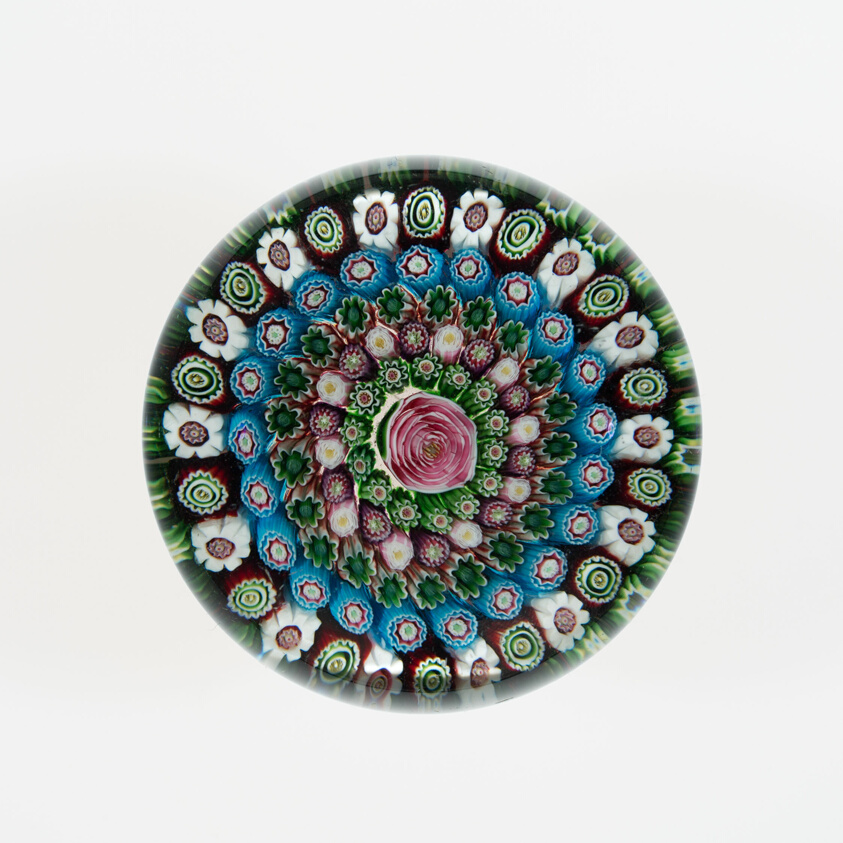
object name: Glass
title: Paperweight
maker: Clichy Glassworks (Cristalleries de Clichy); Clichy, France, 1837-1885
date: 19th century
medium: Glass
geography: Clichy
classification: paperweight; millefiori; european decorative arts; glass